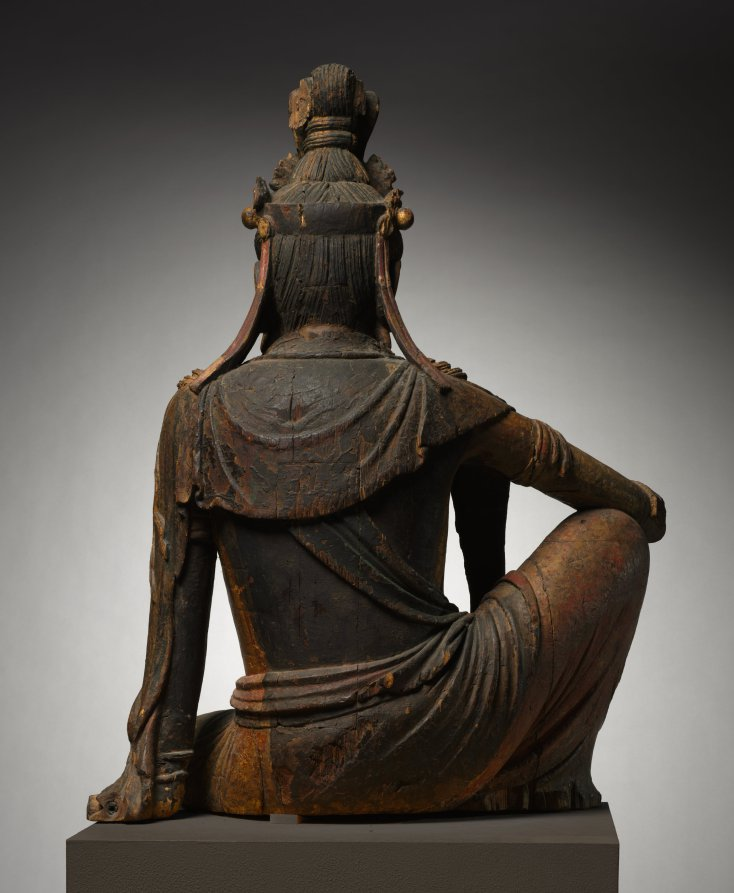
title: Seated Guanyin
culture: China, late Northern Song dynasty (960-1127) - Jin dynasty (1115-1234)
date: late 1100s–1200s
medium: wood with polychromy and gilding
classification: Sculpture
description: The South Sea Guanyin was originally seated on a rocky throne to represent the shore of his home in the mythical island of Potala. His right leg is raised, the arm resting on the folded knee in a relaxed position. With an expression of grace, calmness, and compassion, the Guanyin is especially appealing as the "guide of souls" who offers hope for salvation.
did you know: After acquisition, the CMA conservator meticulously used surgical knives and etching tools to uncover the sculpture's original polychromy and gilding, hidden beneath layers of protective varnish and paint.